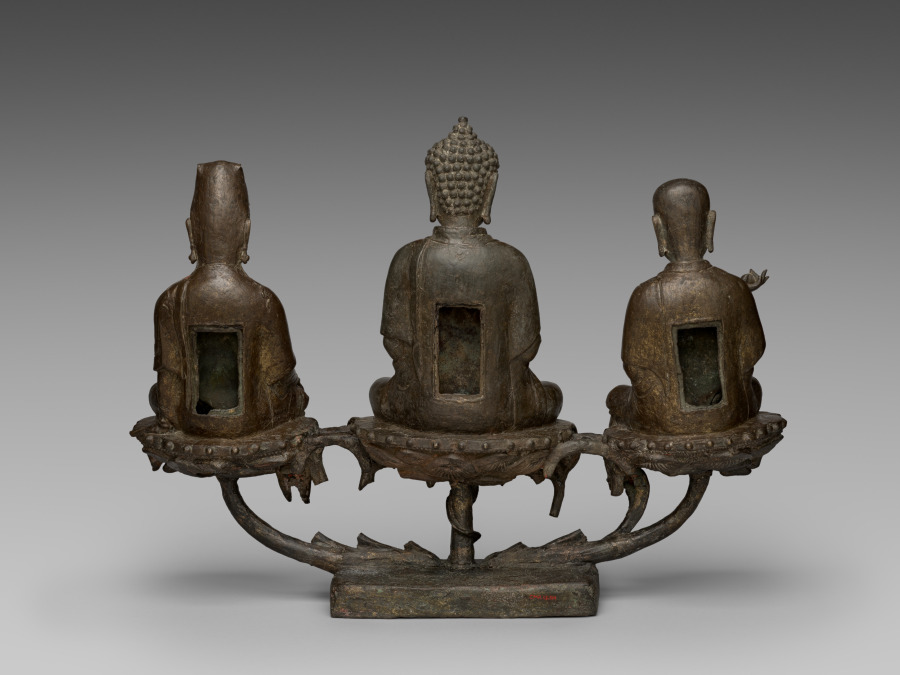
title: Amitabha Triad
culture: Korea, Joseon dynasty (1392–1910)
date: 1400s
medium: bronze with traces of gilding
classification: Sculpture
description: This bronze triad depicts Amitabha, the Buddha of Western Paradise, at the center, flanked by two bodhisattvas: Ksitigarbha on his left and Avalokiteśvara on his right. Ksitigarbha is believed to rescue those tormented beings from purgatory, while Avalokiteśvara offers relief to those suffering in the mortal realm. An exceptionally rare statue from the 1400s, this piece entered the CMA’s collection in 1918. It was discovered in Korea in 1916 by Langdon Warner (1881–1955), who was serving as the CMA’s field agent. In a letter dated December 4, 1916, Warner expressed not only his excitement upon finding the triad in a local pawn shop but also his satisfaction at purchasing it at a significantly reduced price.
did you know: The small scale suggests that this rare bronze triad might have been displayed in a personal shrine rather than a large worship hall.